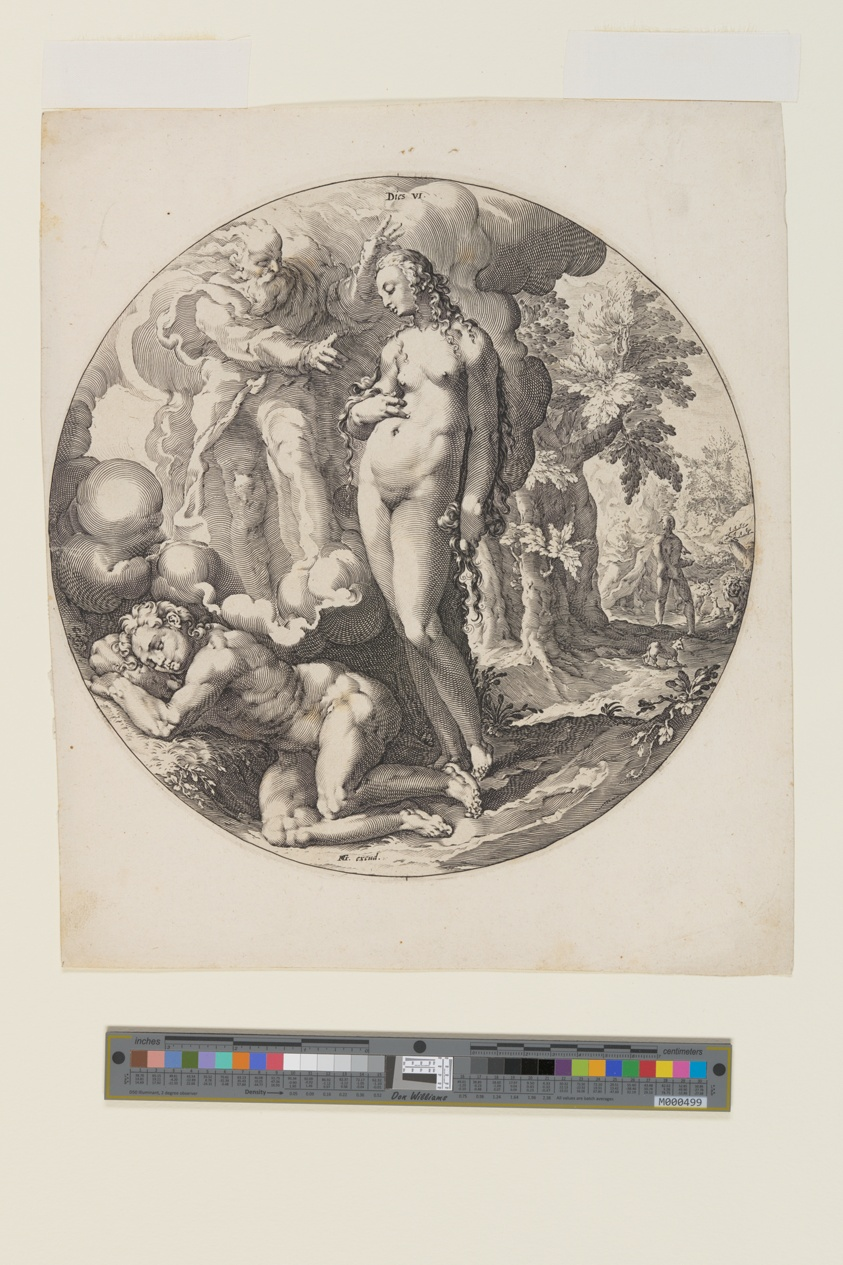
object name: Print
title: The Sixth Day, plate 7, from Creation of the World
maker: Jan Harmensz Muller (Dutch, 1571–1628); after Hendrick Goltzius (Dutch, 1558–1617)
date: 1590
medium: Engraving on ivory laid paper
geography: Netherlands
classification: print; paper; prints and drawing; engraving